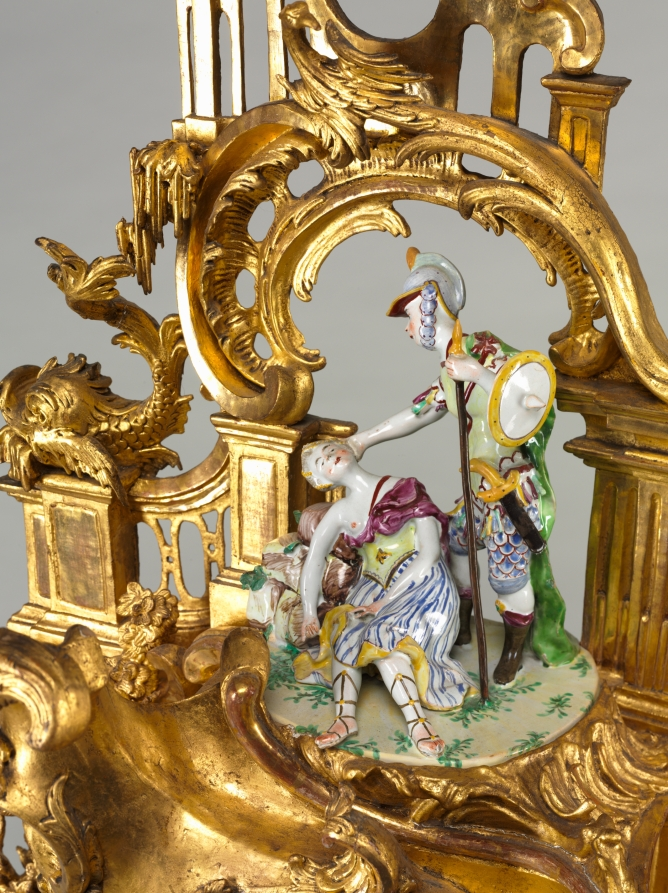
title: Clock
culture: Germany, 18th century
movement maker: Baumgartinger (German)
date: c. 1750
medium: carved and gilded wood, faience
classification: Furniture and woodwork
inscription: inscribed on face: Baumgartnger [sic] Mergentheim.